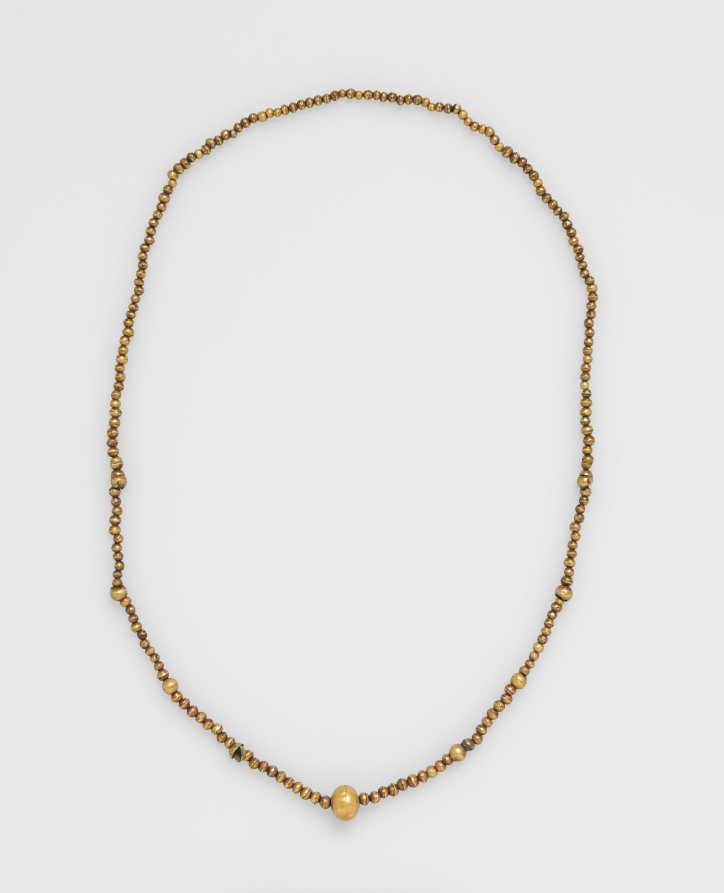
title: Necklace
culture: Peru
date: before 1532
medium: gold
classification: Jewelry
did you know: These ancient beads were restrung in modern times.